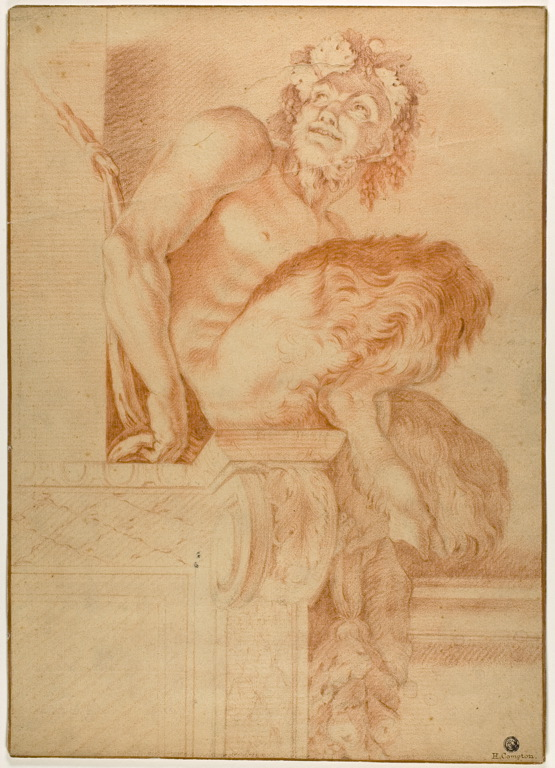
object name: Drawing and Watercolor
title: Seated Satyr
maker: After Annibale Carracci; Italian, 1560-1609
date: 1622/94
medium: Red chalk, over black chalk, on tan laid paper with blue fibers, laid down on cream laid paper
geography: Italy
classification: chalk; drawings (visual works); prints and drawing